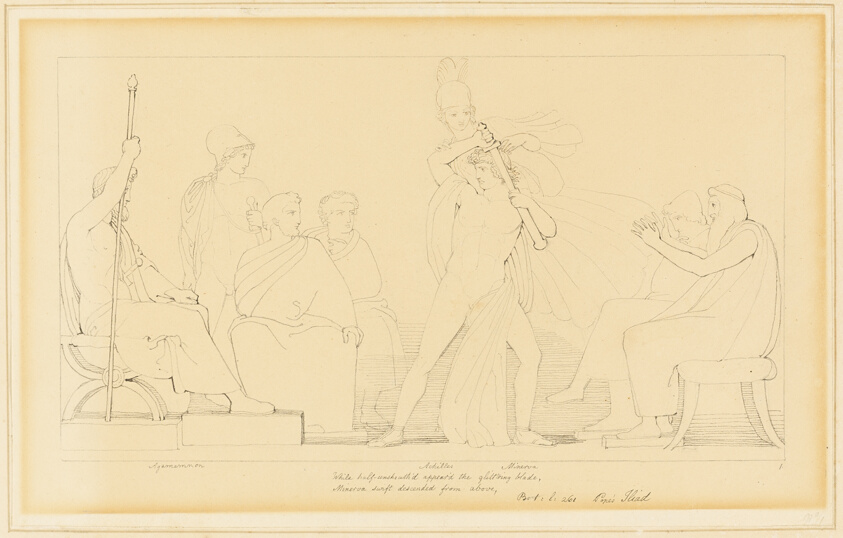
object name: Drawing and Watercolor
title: Minerva and Achilles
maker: John Flaxman, II; English, 1755-1826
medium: Pen and gray and brown ink, over graphite, on tan wove paper, laid down on buff wove paper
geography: England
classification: pen and ink drawings; drawings (visual works); prints and drawing